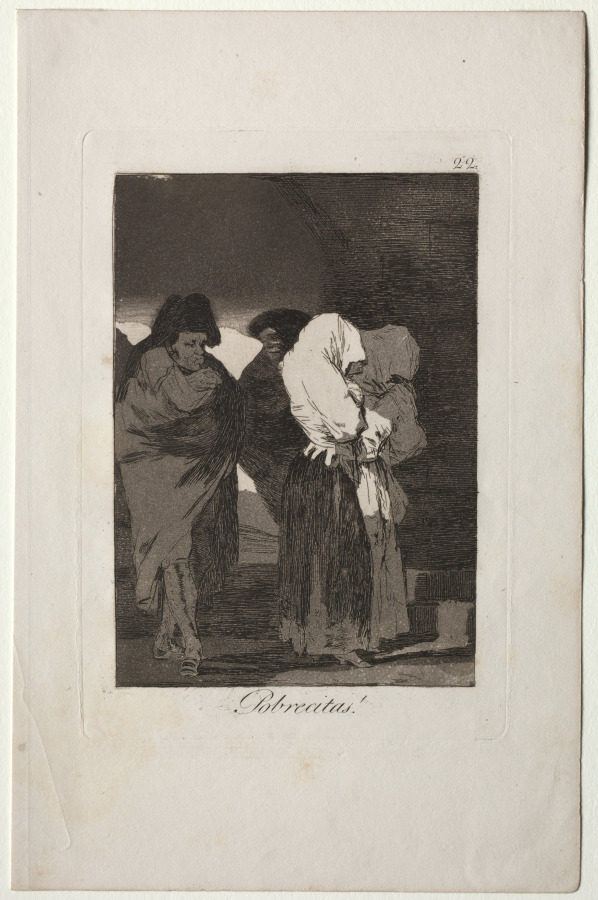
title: Poor Little Girls!, Plate 22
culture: Spain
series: Los Caprichos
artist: Francisco de Goya (Spanish, 1746–1828)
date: 1799 (printed c. 1855)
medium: etching and aquatint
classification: Print